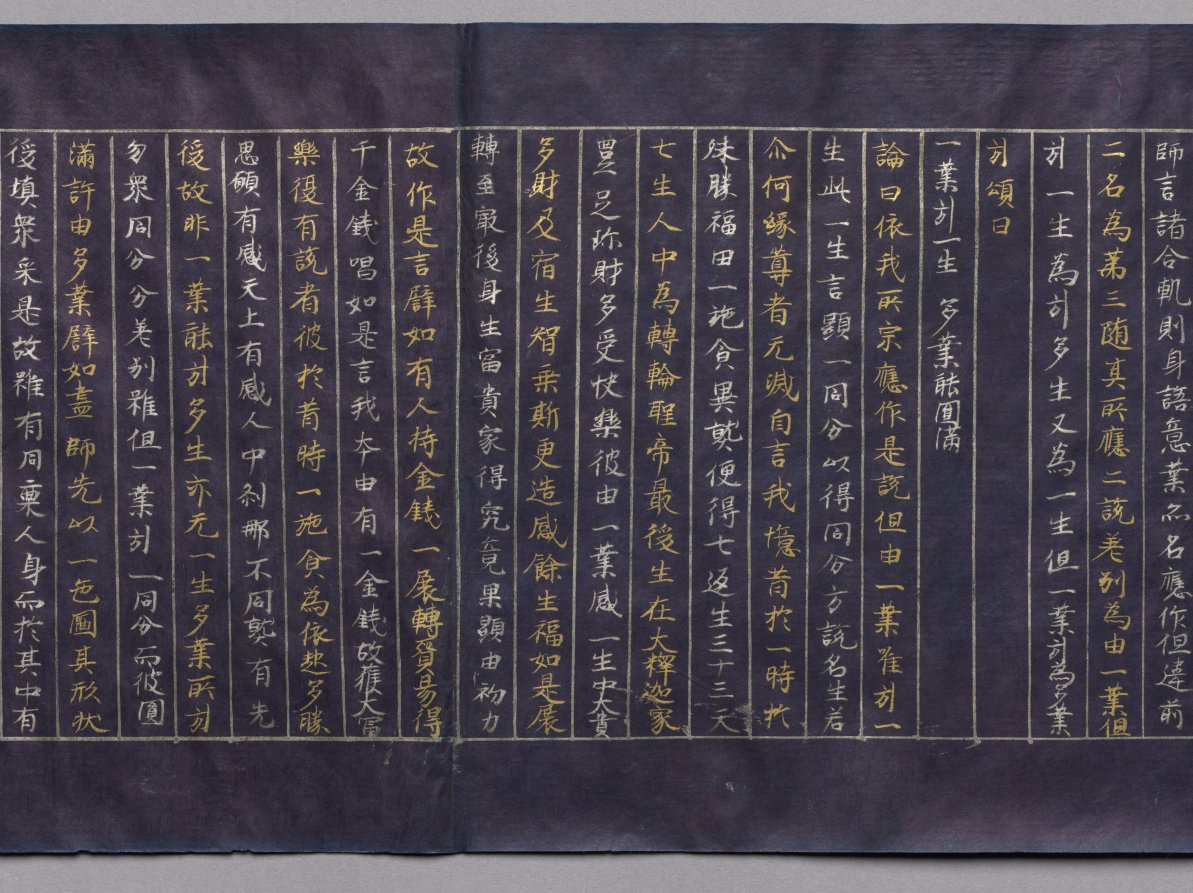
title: Meta-Discourse on the Teachings from the Treasury (Abidharmakosha-Bhashya)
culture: Japan, Heian period (794–1185)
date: 1100s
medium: handscroll; gold and silver on indigo-dyed paper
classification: Manuscript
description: This religious text relates some of the teachings of the great fourth-century Indian Buddhist scholar Vasubhandhu. The text analyzes human consciousness in its relationship to the environment and transformations that occur during meditation. This scroll is the 17th part of a 30-part translation of the text by Xuanzang, an eminent seventh-century Chinese monk.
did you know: The frontispiece depicts the Buddha Shakyamuni preaching in a paradisical landscape.